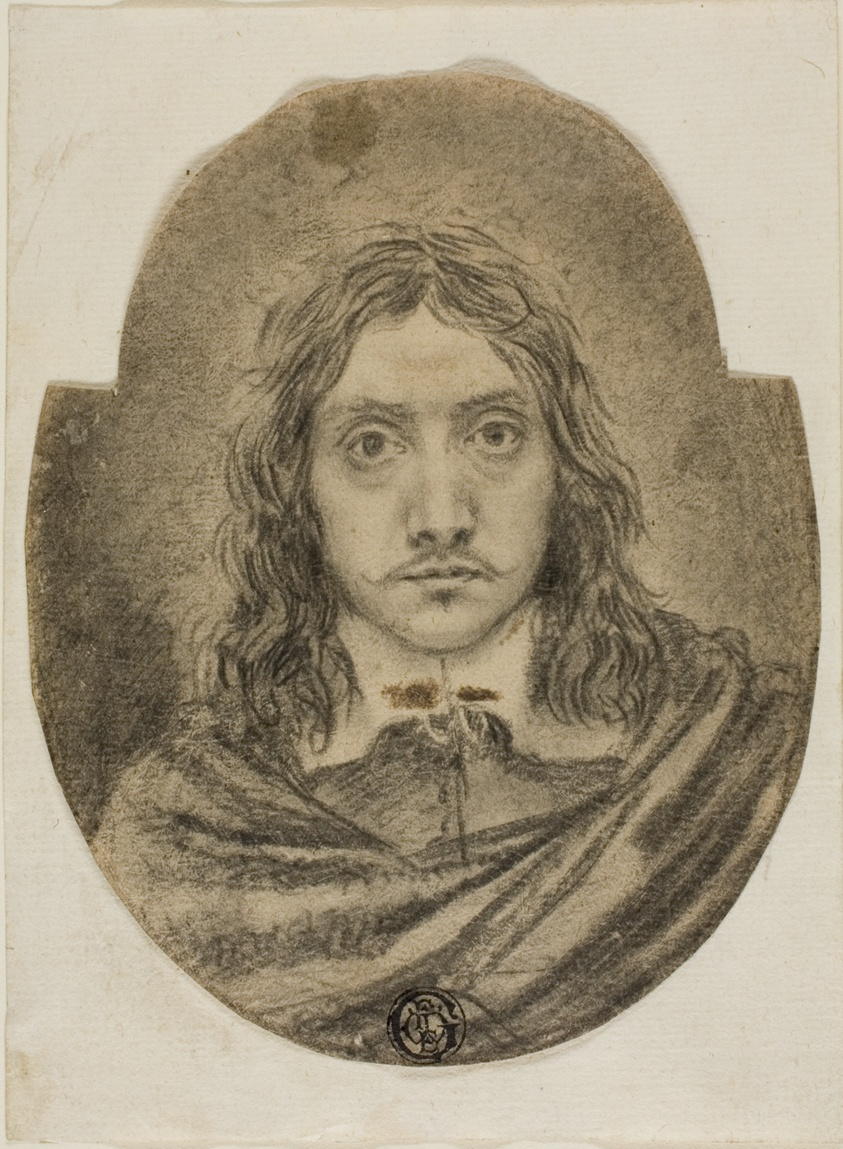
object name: Drawing and Watercolor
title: Moliere?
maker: Attributed to Robert Nanteuil; French, 1623-1678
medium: Black chalk on cream laid paper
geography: France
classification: chalk; drawings (visual works); prints and drawing